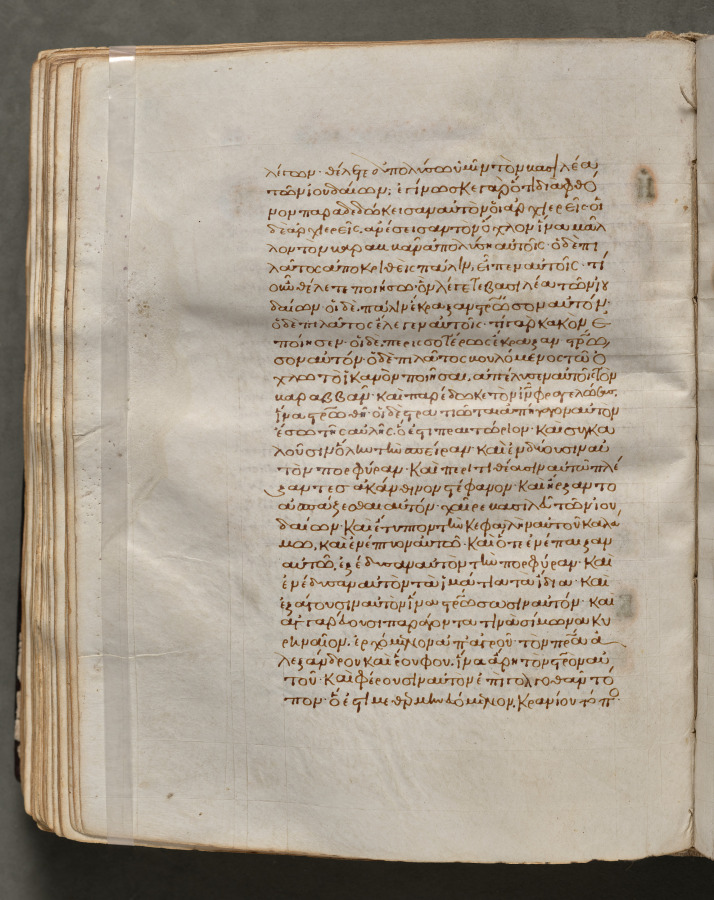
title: Text, folio 193 (verso), from a Gospel Book with Commentaries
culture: Byzantium, Constantinople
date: c. 1000–1100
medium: ink, tempera, and gold on vellum; leather binding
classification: Bound Volume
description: Each of the four gospels in this book opens on a page with brilliantly illuminated borders depicting the author of the text as well as birds-principally peacocks, symbols of the immortality of the soul-and fountains, representing the fountain of life and the salvation of the soul. This volume consists of 428 leaves with texts in Greek. Its level of sophistication suggests that it was probably written and decorated in a monastery in Constantinople.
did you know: Gospel Books were carried in procession through Byzantine churches.